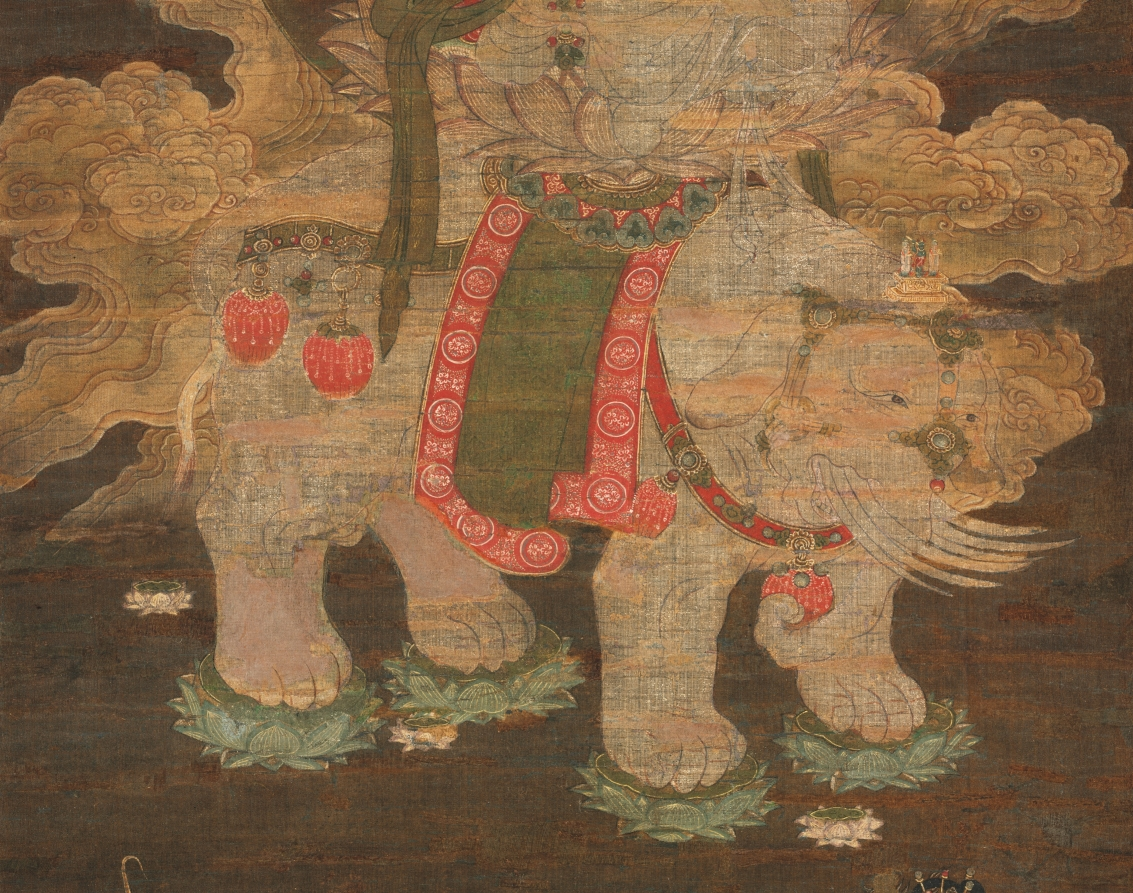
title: Shakyamuni Triad: Buddha Attended by Manjushri and Samantabhadra (Bodhisattva with Elephant)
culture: China, Fuzhou, Fujian Province, Yuan dynasty (1271-1368)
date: late 1300s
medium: Hanging scroll; ink and color on silk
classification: Painting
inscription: Inscription at the bottom of the central scroll reads: "Da Song Fuzhou fu…(Fuzhou prefecture of the great Song)."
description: This triptych is a rare example of Yuan Buddhist painting. It depicts the historic Buddha Shakyamuni flanked by two attending bodhisattvas, Manjushri (the bodhisattva of wisdom, riding a lion) and Samantabhadra (the bodhisattva of universal virtue, riding an elephant). Below them are others seeking enlightenment: two disciples of the Buddha (Ananada and Kasyapa), two non-Chinese people, a boy with topknots, and a female worshiper. The clouds above and around the divine beings form one scene that illustrates Shakyamuni’s sermon from the Lotus Sutra. This text became an important basis for Buddhist faith throughout East Asia and was central to the Mahayana school of Buddhism.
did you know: Samantabhadra, the bodhisattva of universal virtue, is mounted on a six-tusked white elephant standing on lotus flowers.